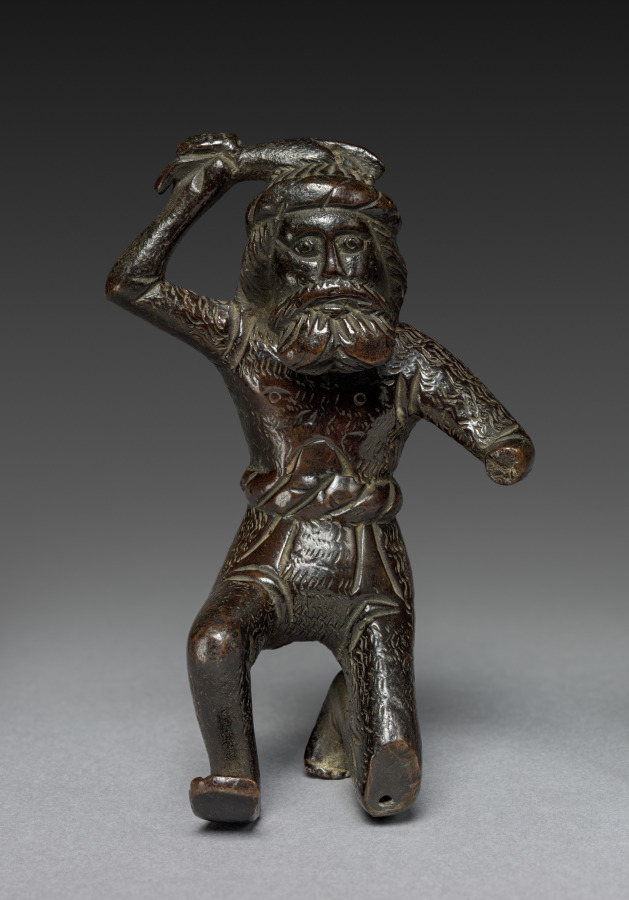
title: Wild Man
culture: Germany, Nuremberg(?)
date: late 1400s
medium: copper alloy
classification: Sculpture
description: Common in medieval art, the wild man is humanlike in appearance with long shaggy hair over his entire body and typically carries a club. Living at the fringe of society in woodland areas, wild men symbolized man in his natural, uncivilized state. Perhaps derived from the part-man part-beast satyr of antiquity, the wild man symbolized lust and aggression in contrast to the spiritual love embodied in medieval chivalry. This bearded version is shown kneeling while raising his right arm holding a club. He wears a twisted cloth circlet on his head and a similar belt at the waist. It has been suggested that this sculpture originally formed part of a suspended candelabra. It may also have served as support for large metal vessels.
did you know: The wild man is derived from the Greek satyr who lived in the woods.